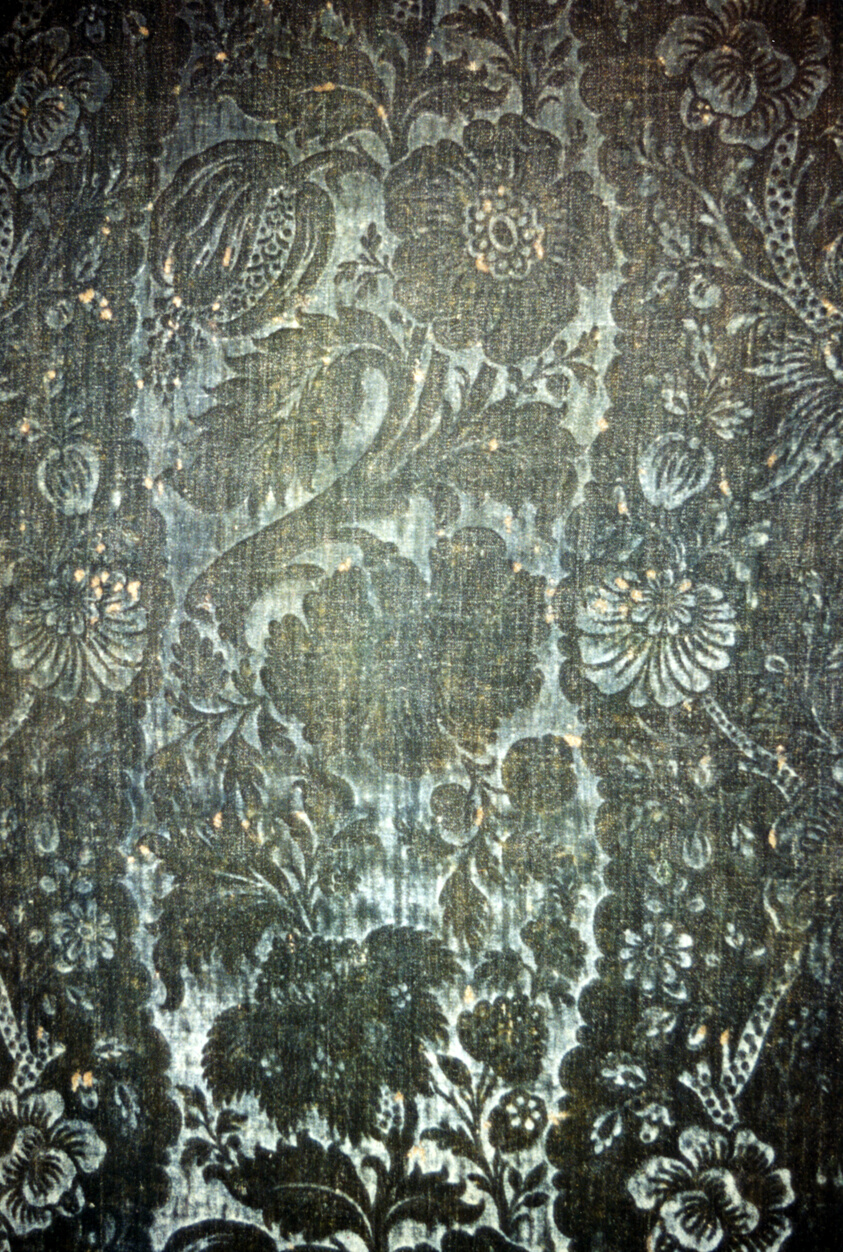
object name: Textile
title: Panel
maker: France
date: c. 1730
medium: Wool and linen, plain weave with supplementary pile warps forming cut solid velvet; stamped; of a type known as "velours de trek"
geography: France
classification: textile; weaving - velvet